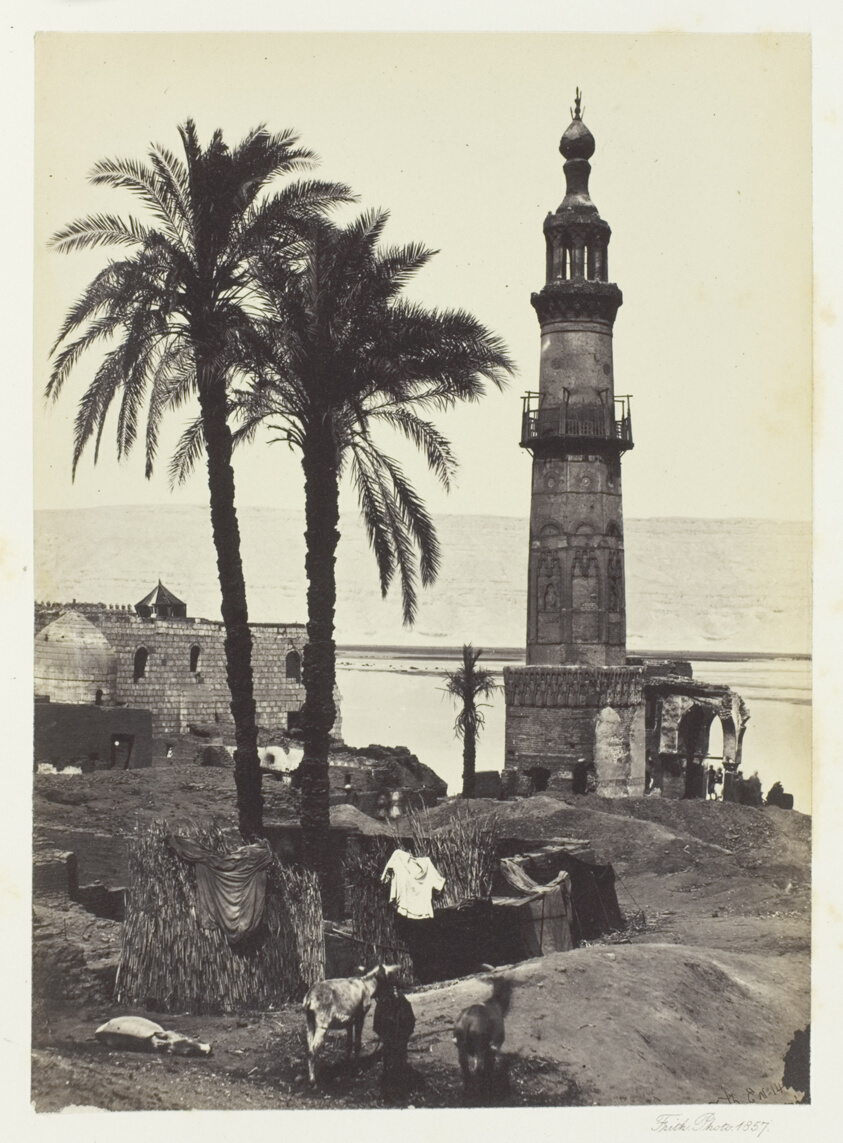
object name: Photograph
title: View at Girgeh, Upper Egypt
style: 19th century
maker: Francis Frith (English, 1822–1898)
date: 1857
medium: Albumen print, pl. 26 from the album "Egypt and Palestine, Volume I" (1858)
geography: England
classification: photograph; albumen silver print; photography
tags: Collected by Hugh Edwards, Egypt and Palestine